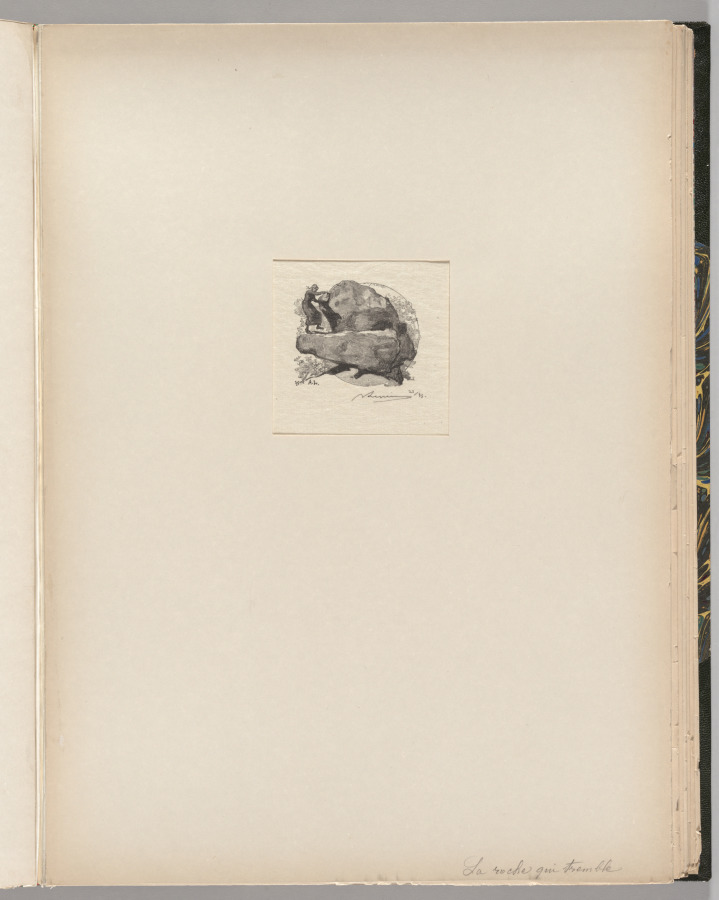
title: Fontainebleau Forest: The Trembling Rock (La Forêt de Fontainebleau: La roche qui tremble)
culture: France, 19th century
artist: Auguste Louis Lepère (French, 1849–1918)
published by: A. Desmoulins, Published in Revue Illustrée, 1887–90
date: 1890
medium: wood engraving from bound volume of 34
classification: Bound Volume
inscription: On block, lower left: E.14 A.L.; below image, lower right, in black ink: ALepère 22/35; on window mat, lower right, in graphite: La roche qui tremble